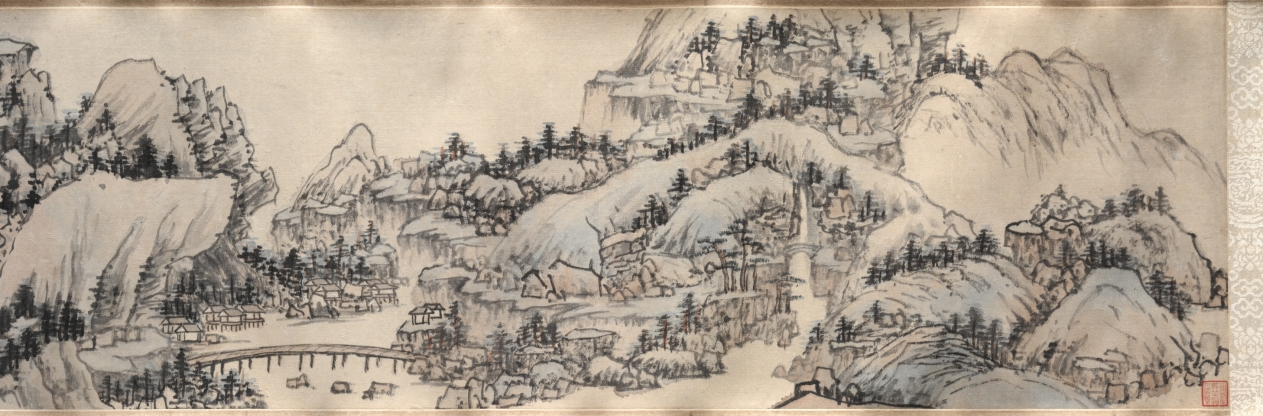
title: Dream Journey among Rivers and Mountains, no. 90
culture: China, Qing dynasty (1644-1911)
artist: Cheng Zhengkui (Chinese, 1604–1676)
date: 1658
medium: Handscroll; ink and color on paper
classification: Painting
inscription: 江山臥遊圖其九十, 青溪道人, 戊戌夏五。 [印] 程正揆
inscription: Title and inscription by Huang Yi 黃易 (1744–1802), and 3 seals.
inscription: 1 colophon and 9 additional seals: 3 seals of Dai Zhi 戴植 (active about 1821–1850); 1 colophon, dated 1914, and 3 seals of Yan Shiqing 顏世清 (1873–1929); 3 seals of Wang Nanping 王南屏 (1924–1985).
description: Cliffs and waterfalls interspersed with trees and dotted vegetation are spread over this handscroll. Long paths wind their way through villages, beside cottages, shrines, and over bridges. In the past, Chinese literati officials liked to take a “dream journey” along mountains and rivers when viewing landscape paintings in their studios. Scenery of this kind thus became a way to escape from the world of bureaucracy and administration. The painter Cheng Zhengkui used the title “Dream Journey” for a whole series of paintings, of which this is number 90. He is said to have painted 500 of them, but the actual count remains unknown.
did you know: Cheng Zhengkui planned to make 100 dream journey paintings but may have ultimately made 500.